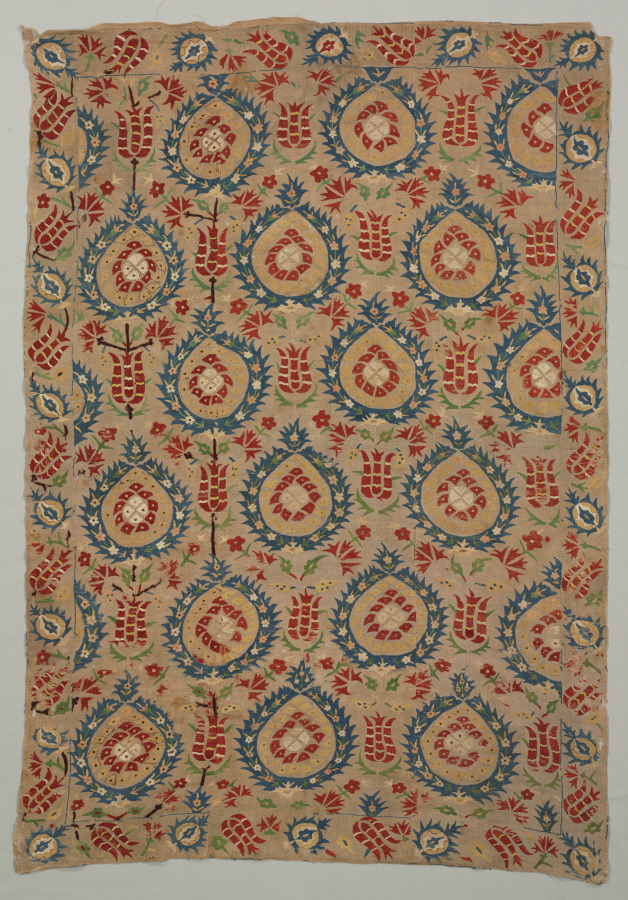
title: Embroidered quilt with pomegranates and tulips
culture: Turkey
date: 1600s-1700s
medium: plain weave: linen; embroidery, running stitch: silk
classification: Embroidery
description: In Turkey, embroidered motifs were often adapted from Ottoman court art, especially luxury silks. Even the same six colors of silk thread were used: crimson or red, blue, green, and brown/black, plus yellow and white that replaced costly gilt- and silver-metal thread. In a typically bold style, pomegranates are framed by serrated leaves. Most of the original dark brown silk thread of the floral stems has disintegrated, revealing black ink outlines on the linen ground.